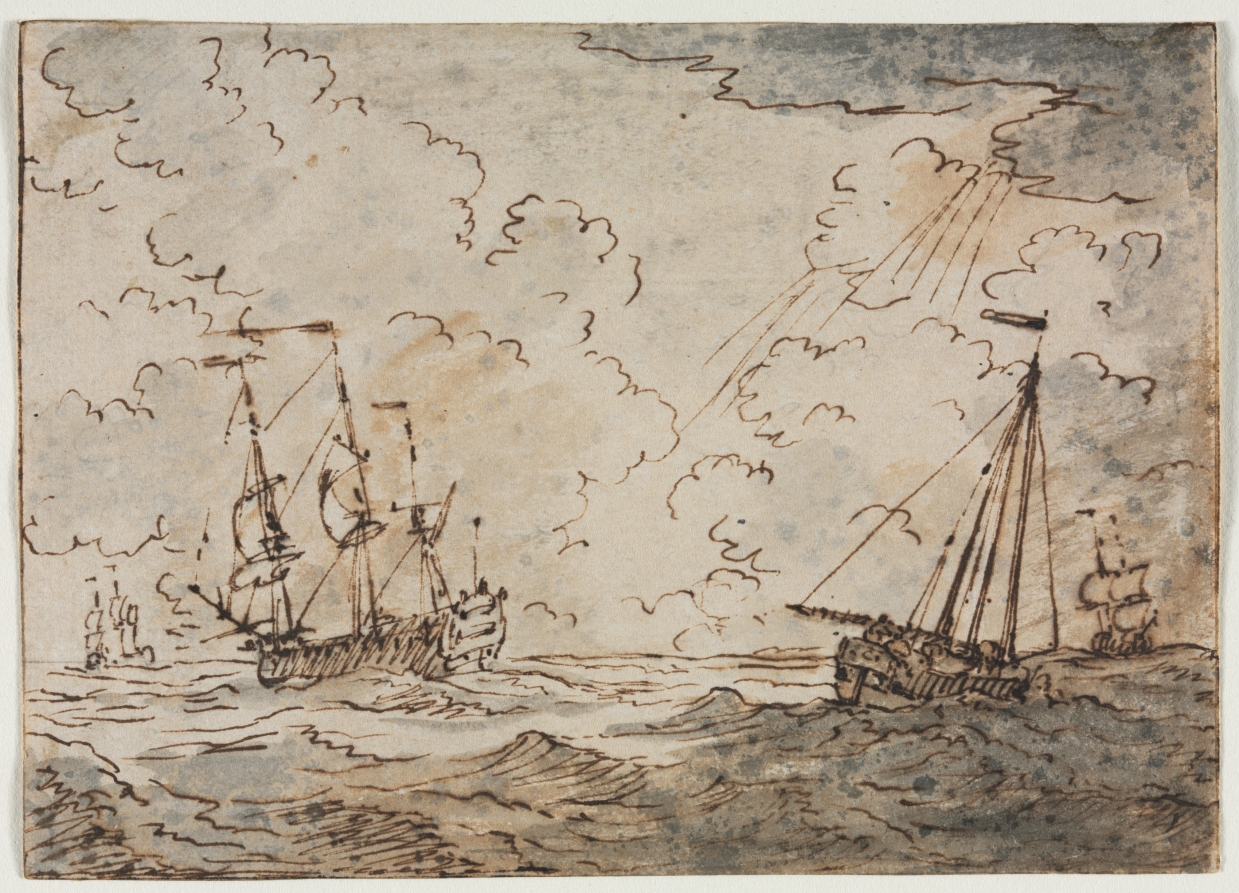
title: Ships at Sea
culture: Netherlands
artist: Ludolf Backhuysen (Dutch, 1631–1708)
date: 1600s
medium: pen and brown ink and brush and gray and brown wash, with brush and grey ink; framing lines in brown ink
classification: Drawing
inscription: VERSO, lower center, in brown ink: Jan Eraht[?]1315 [?, upside down]